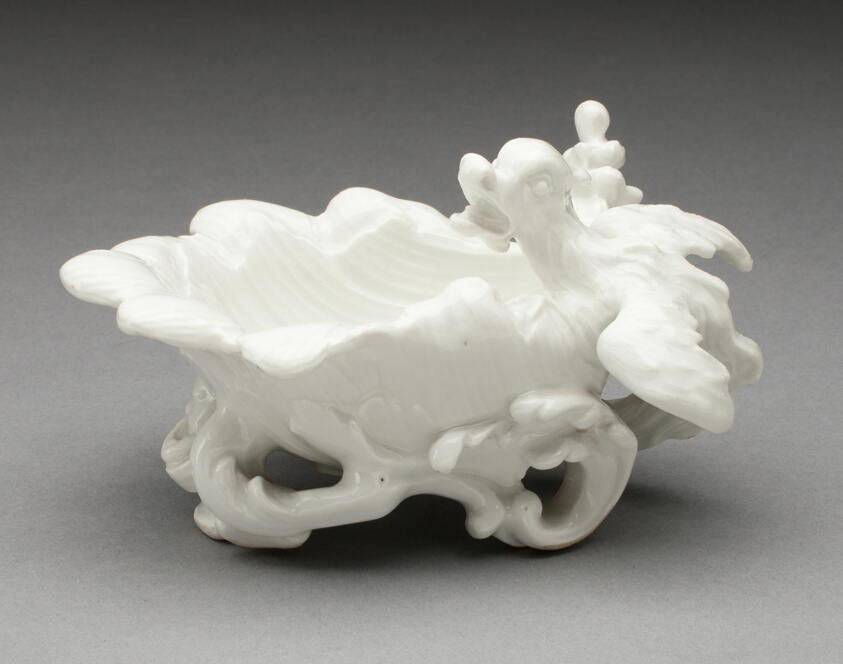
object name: Ceramics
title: Salt Cellar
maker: Meissen Porcelain Manufactory (German, founded 1710)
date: 1730/35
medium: Hard-paste porcelain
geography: Meissen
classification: tableware; ceramics; porcelain; european decorative arts